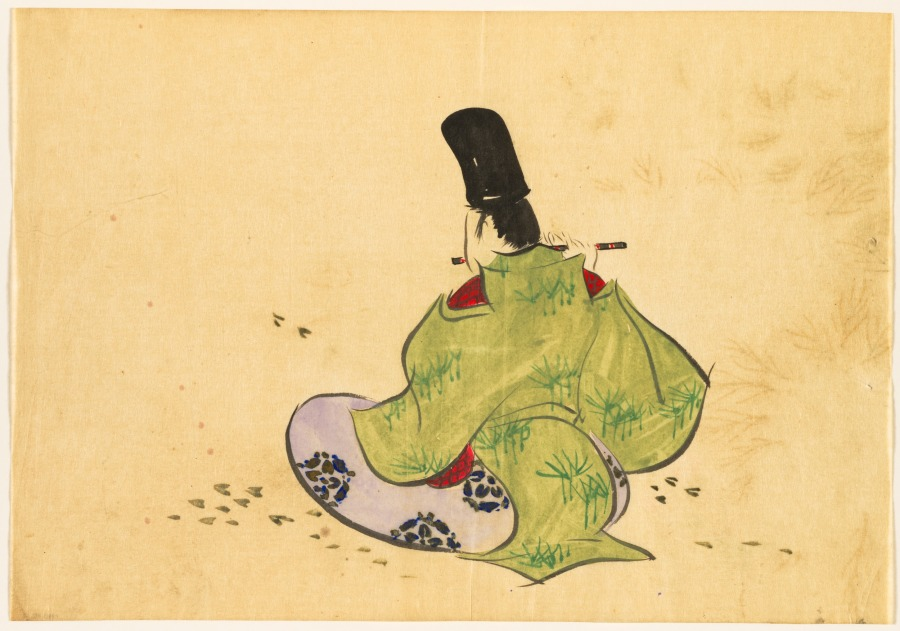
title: Flowers of a Hundred Worlds (Momoyogusa): Late Spring (Boshun)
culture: Japan, Meiji period (1868–1912)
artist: Kamisaka Sekka (Japanese, 1866–1942)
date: 1909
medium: ink and color on paper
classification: Drawing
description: Kamisaka Sekka made preparatory drawings for his Flowers of a Hundred Worlds series on tracing paper with ink and color. The freehand sketches are much looser than the finished, printed compositions.